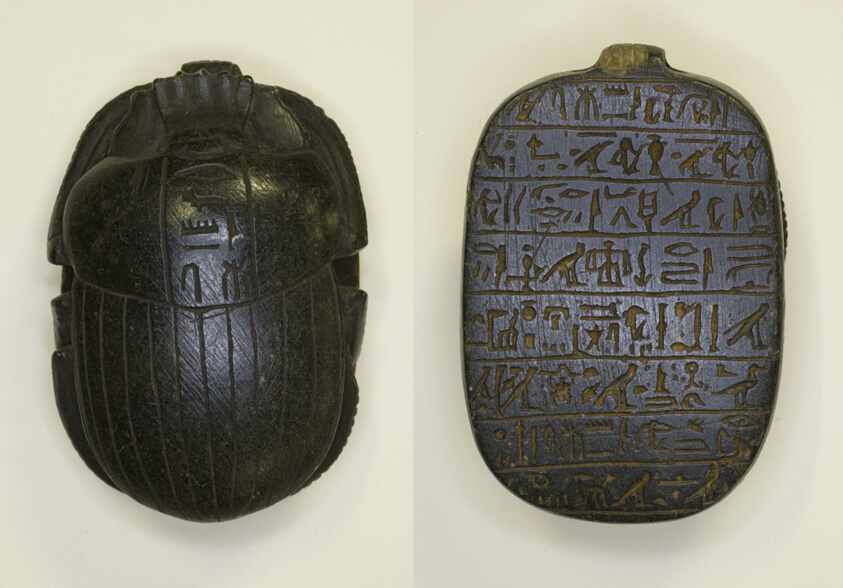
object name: Costume and Accessories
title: Heart Scarab of the Worker Amun-mes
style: new kingdom, egyptian, ancient, nineteenth dynasty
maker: Egyptian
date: New Kingdom, Dynasty 19, reign of Ramesses II (about 1279-1213 BCE)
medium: Steatite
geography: Egypt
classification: scarab; stone; ancient art; costume; amulet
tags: scarab beetle, insects, Hieroglyphs